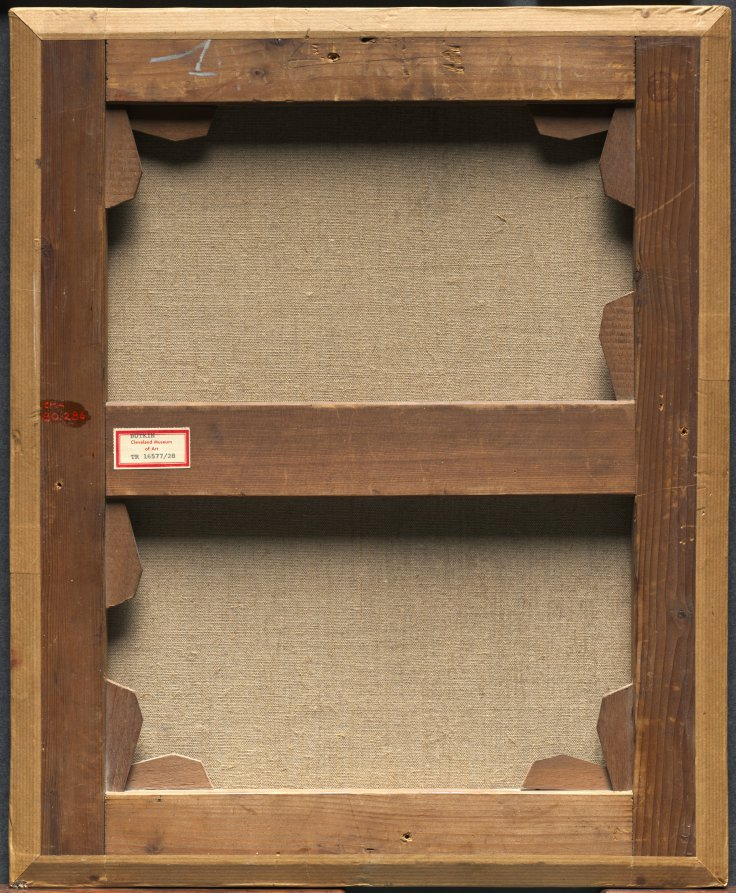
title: The Bourgeois' Kitchen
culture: France, 19th century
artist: Octave Tassaert (French, 1800–1874)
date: 1854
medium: oil on fabric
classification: Painting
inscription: Signed lower right: Oct Tassaert / 1854